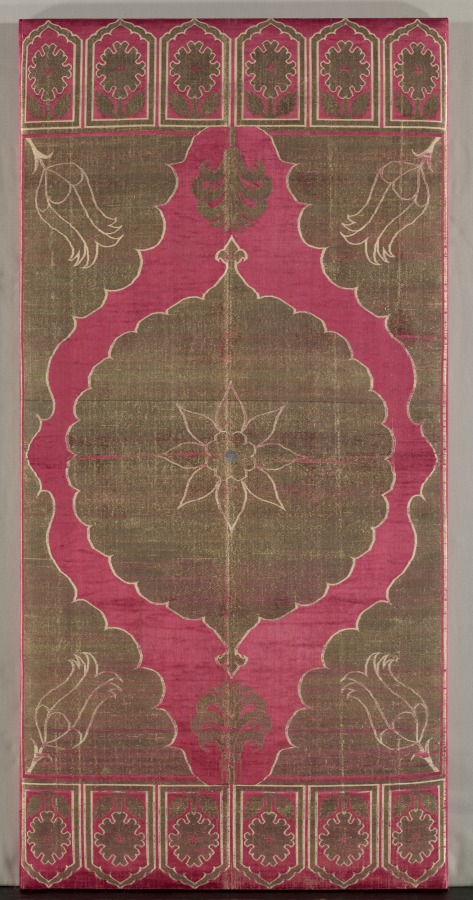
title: Brocaded Silk Cushion Cover & Iranian Striped Silk Surround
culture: Turkey, Bursa or Istanbul, Ottoman period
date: early 1600s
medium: silk, gilt-metal thread; lampas weave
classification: Textile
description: Cushion covers, associated with comfort, were made especially to cover cushions placed on divans, the equivalent of sofas. Most were woven in brocaded velvet because the projecting pile could withstand abrasion more effectively than this rare brocaded silk example. Cushion covers typically display a row of six lappets (flaps or folds) across each end of a field decorated with either a repeating motif or a medallion pattern as shown here. Opulent gilt-metal thread forms the elegant minimalist pattern on a lustrous crimson silk ground. All the designs—the medallion and corner medallions, central rosette, and corner tulips, plus the lappets bearing rosettes—are outlined in silhouette.